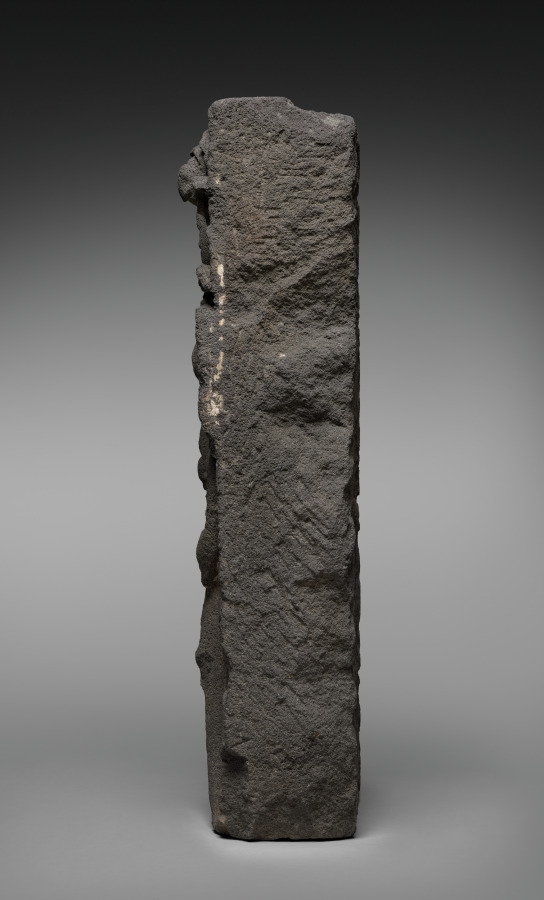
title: Goddess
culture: Indonesia, Central Java, Boyolali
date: 800s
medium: volcanic stone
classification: Sculpture